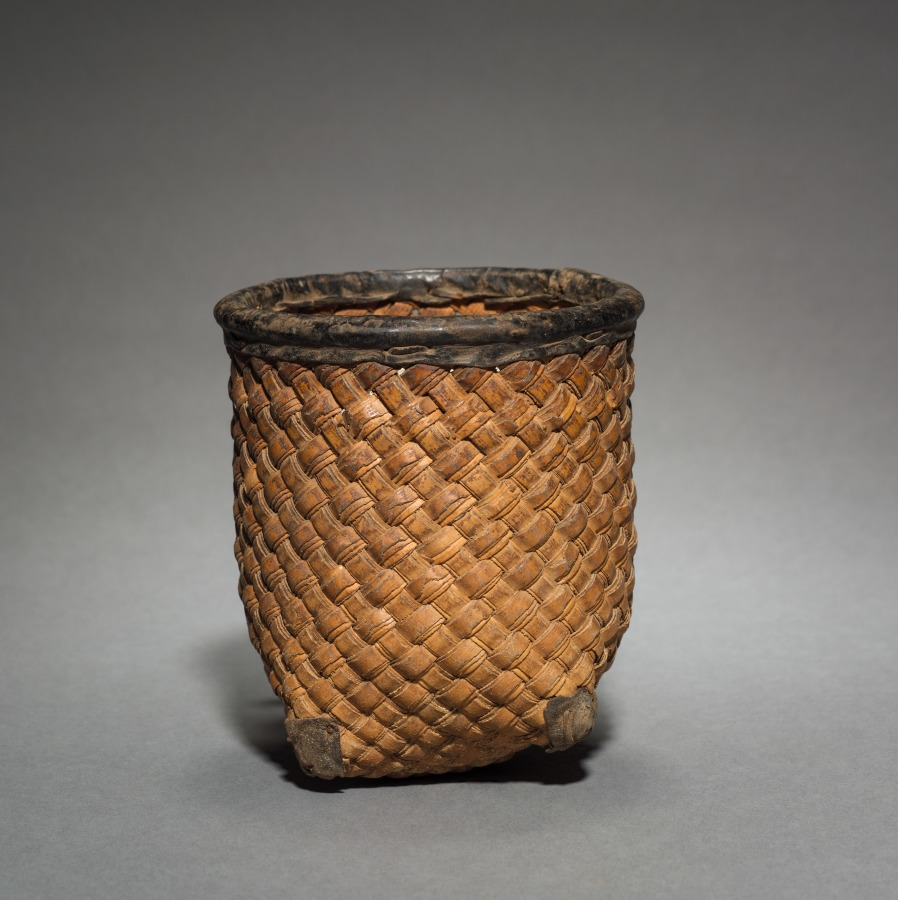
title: One of Ten Nesting Wedding Baskets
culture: Africa, Western Africa, Burkina Faso, Lobi–style maker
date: c. 1900s?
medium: Plant fiber and leather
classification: Vessels